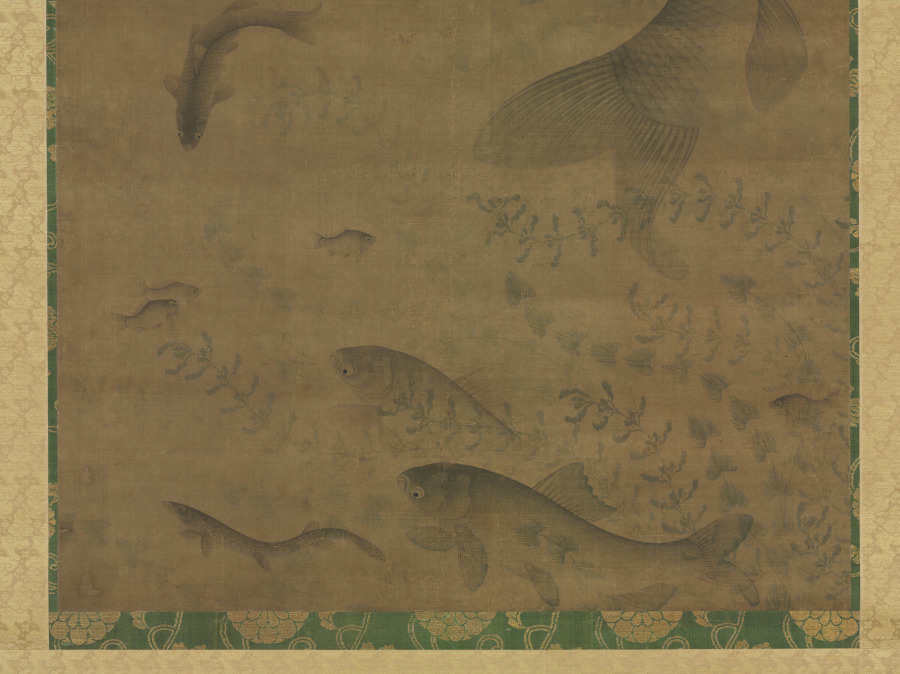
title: Leaping Carp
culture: China, Ming dynasty (1368–1644)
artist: Liu Jie (Chinese, c. 1447–1520s)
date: 1368–1644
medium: hanging scroll, ink and color on silk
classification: Painting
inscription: Artist's signature and seal: Written by Liu Jie 劉節寫. [seal] Chin-i-chih-hui chih chang.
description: With a fine ink line and graded wash, the life-like depiction of these swiftly moving carp is representative of the high quality of works by Liu Jie, a Ming dynasty court painter known for his fish paintings. The artist’s signature and seal are in the painting’s top left corner. The carp is an auspicious and popular subject in Chinese painting. Here, the leaping carp can be associated with “a carp jumping the dragon gate,” which according to mythology transforms into a dragon, emblematic of a scholar’s success in passing the civil service examinations. Another reading suggests that this carp is not leaping but guiding his offspring in worshipping heaven.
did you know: The clusters of geometric leaves painted with mineral pigments are likely water caltrap.